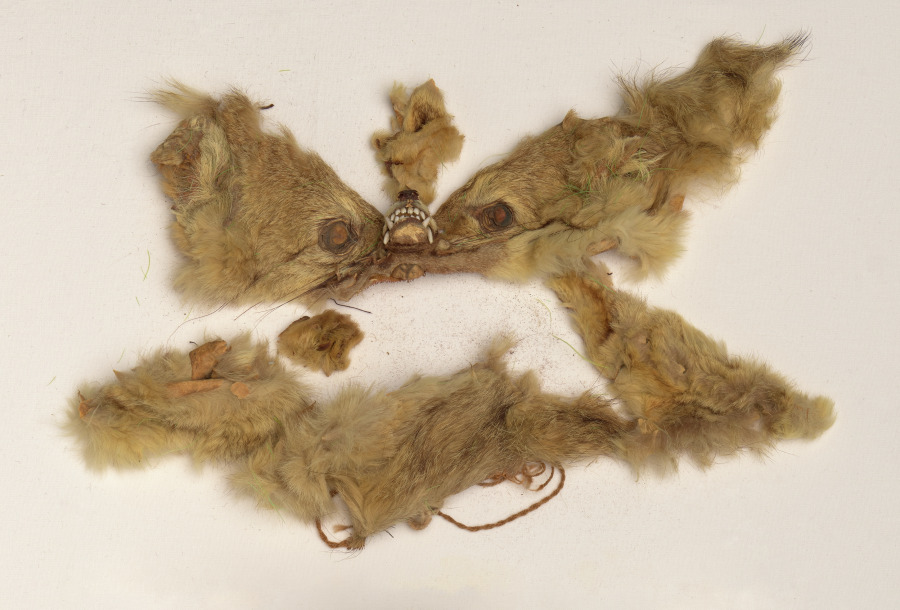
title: Mummy Bundle Turban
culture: Peru, South Coast, Paracas, 200 BC - AD 200, modern assembly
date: c. 650–100 BCE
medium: cotton, reed, wool, fur, feathers and other fibers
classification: Textile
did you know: While all the components appear to be original, they were assembled in modern times.